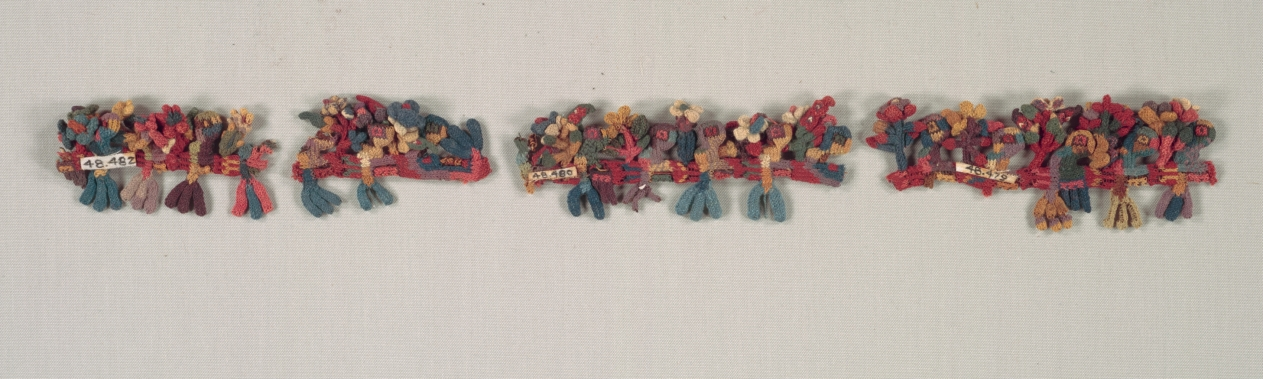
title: Border Fragment with Birds and Flowers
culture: Peru, South Coast, Nasca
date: 100 BCE–700 CE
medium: camelid fiber, cross-knit looping (reversible)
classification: Embroidery